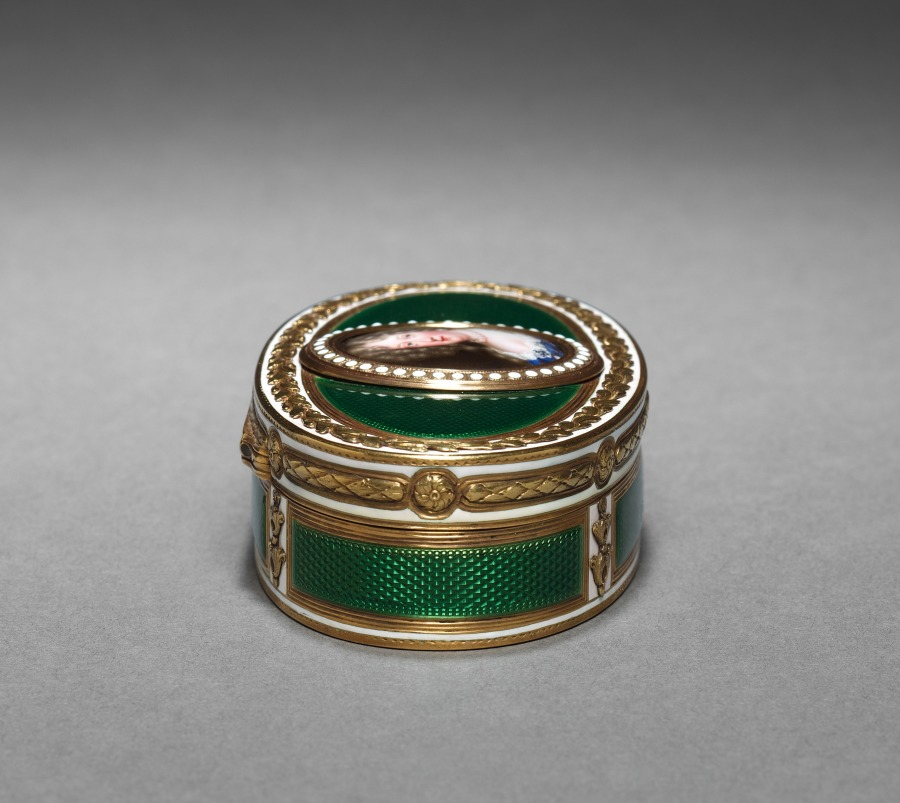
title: Snuff Box (Tabatière) with Portrait of Marie-Thérèse of Austria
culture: France, 18th century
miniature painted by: Jean Petitot (Swiss, 1607–1691)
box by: Charles Le Bastier (French)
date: miniature, c. 1676; box, 1775–76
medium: Gold, enamel, and miniature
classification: Enamel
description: In 18th-century France, ornately enameled boxes that held snuff—powdered tobacco—became a popular accessory in the French court. This box is decorated with a miniature portrait of Marie-Thérèse of Austria, the queen consort of French King Louis XIV. Their union was largely political. A year into their marriage Louis XIV took an official mistress, Madame Pompadour.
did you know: This box resulted from the combined efforts of the popular portrait painter who served the court of French King Louis XIV, Jean Petitot, and master goldsmith Charles Le Bastier.